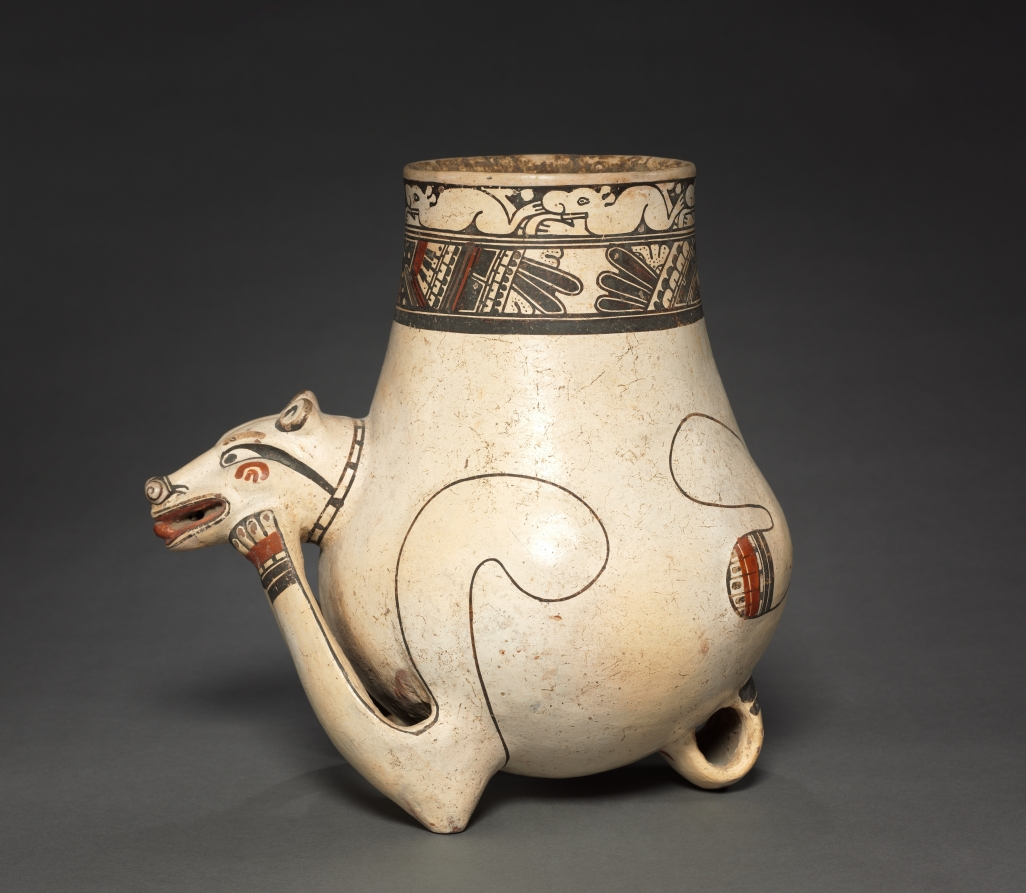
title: Animal Effigy Vessel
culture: Costa Rica, Southern Nicoya region, Pataky Polychrome style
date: 1000–1550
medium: earthenware with colored slips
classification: Ceramic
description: The Pataky style excells in animal portrayals that combine a modeled head with a flat vessel chamber that doubles as the animal’s body. It may be important that many of these animals strike human poses; creatures that combine the human and animal often have mythic import.